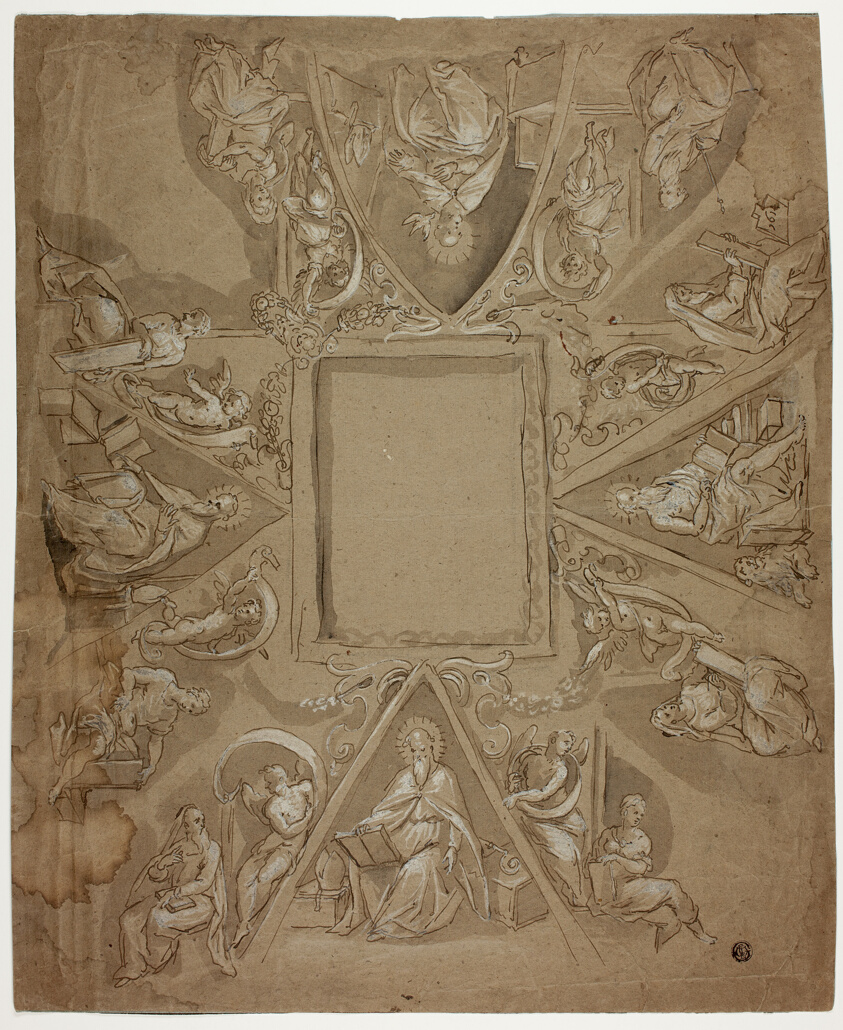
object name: Drawing and Watercolor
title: Ceiling Decoration with Four Fathers of the Church, Sibyls and Prophets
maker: possibly after Pasquale Cati (Italian, c. 1550-c. 1620); Unknown Italian artist; Unknown German artist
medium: Pen and brown ink, and brush and brown and gray wash, heightened with lead white (discolored), on brown laid paper, perimeter mounted on blue laid paper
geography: Italy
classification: pen and ink drawings; drawings (visual works); prints and drawing